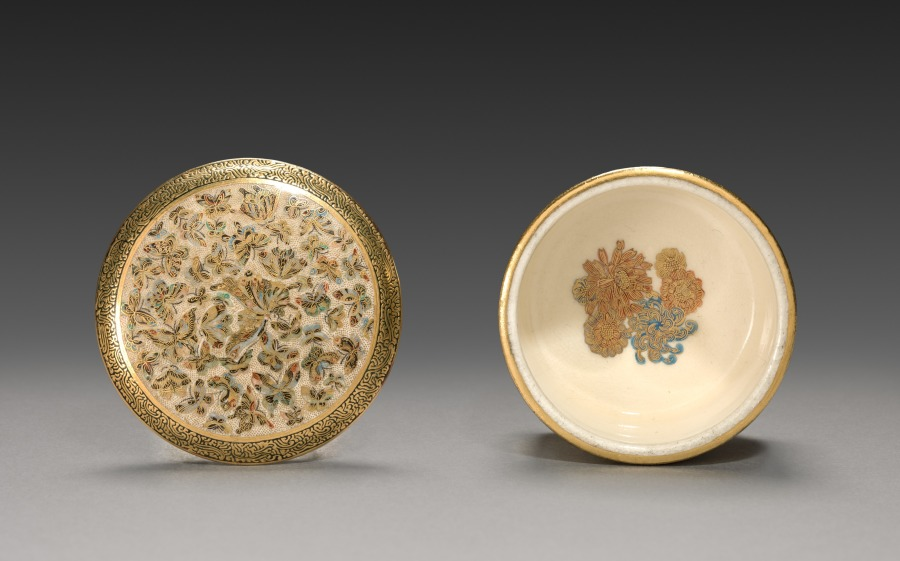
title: Jar with Butterflies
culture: Japan, Meiji period (1868–1912)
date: late 1800s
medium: porcelain (Satsuma ware)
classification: Ceramic